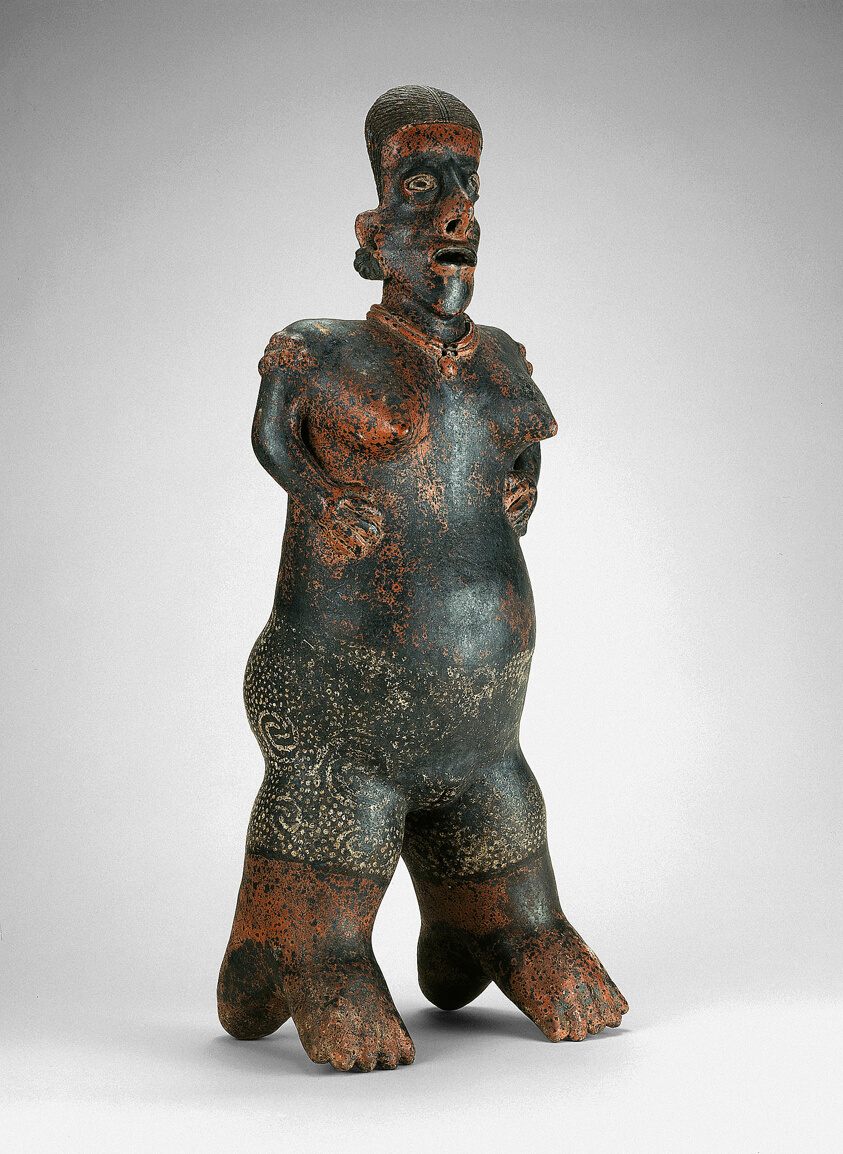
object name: Sculpture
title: Standing Female Figure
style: nayarit, mesoamerican, Pre-Columbian, americas, west mexico, Arts of the Americas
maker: Nayarit (Nayarit, Mexico)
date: 100–300 CE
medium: Ceramic and pigment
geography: Mexico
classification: earthenware; ceramics; sculpture; art of the americas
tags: people, costume, elite, female